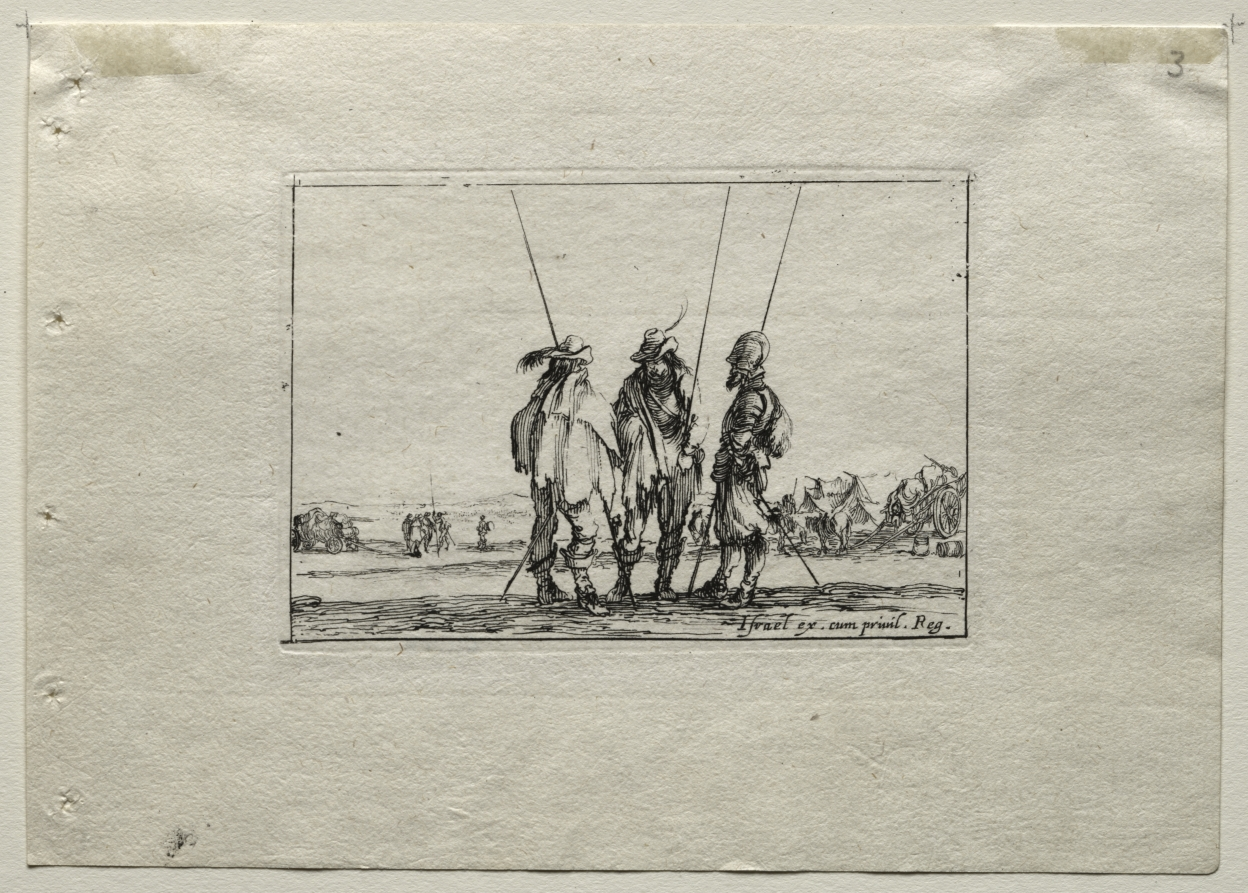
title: Caprices: Three Standing Soldiers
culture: Italy, 17th century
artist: Stefano Della Bella (Italian, 1610–1664)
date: c. 1642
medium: etching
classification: Print